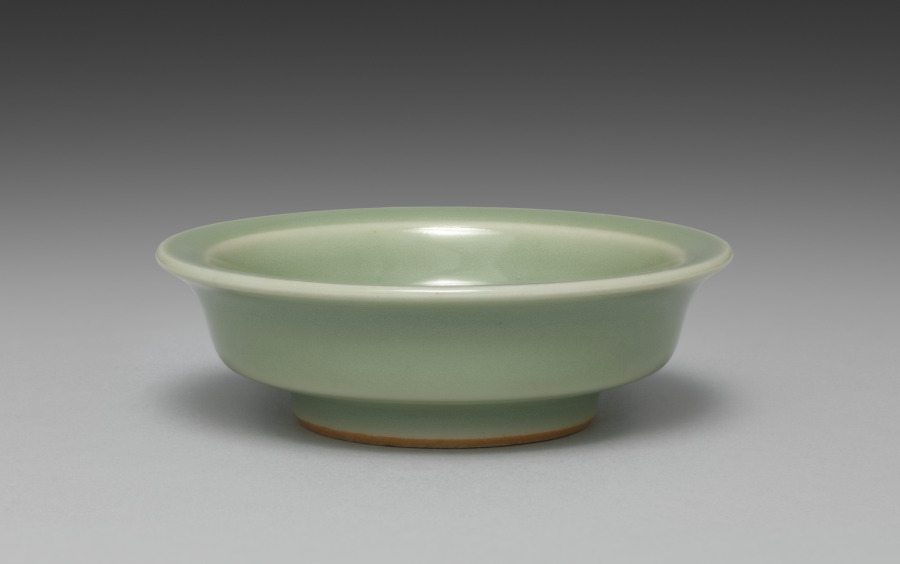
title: Saucer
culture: Japan, Meiji period (1868–1912)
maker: Seifū Yohei III (Japanese, 1851–1914)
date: 1893–1914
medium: One from a set of ten dishes; porcelain with green glaze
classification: Ceramic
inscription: 清風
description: Yohei III’s main output for his sophisticated clientele was in the form of tea sets and dining sets. He created a range of dishes in green glazes. He often produced in pairs, sets of five, or sets of ten. For this set of ten small dishes in a simple, round form that emphasizes the glaze above all, the box lid designates the piece as seiji, or green-glazed porcelain, using a general term for the extensive palette of green glazes often called celadon in English. The box lid further identifies the dishes themselves as tōchō, literally “bean-sized saucers,” a size that makes them suitable for dipping sauces.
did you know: The ten dishes in this set are stored in stacks of five in a two-compartment box.